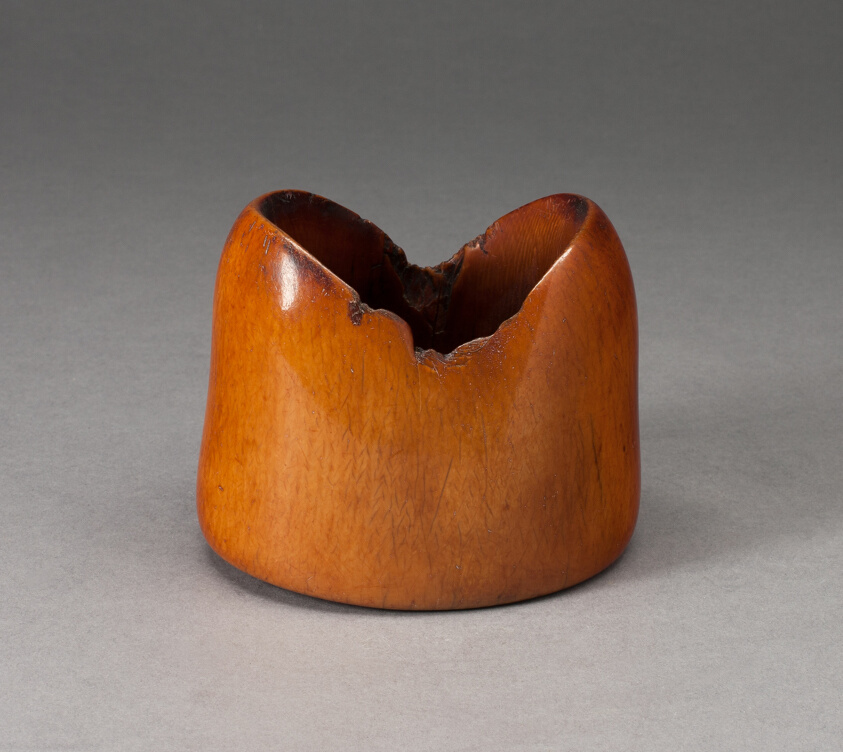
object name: Costume and Accessories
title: Four Bracelets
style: igbo, Arts of Africa, african Art, Coastal West Africa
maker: Igbo; Nigeria; Coastal West Africa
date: Probably 19th century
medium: Ivory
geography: Nigeria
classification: bracelet (jewelry); ivory; jewelry; arts of Africa; african art; costume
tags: costume